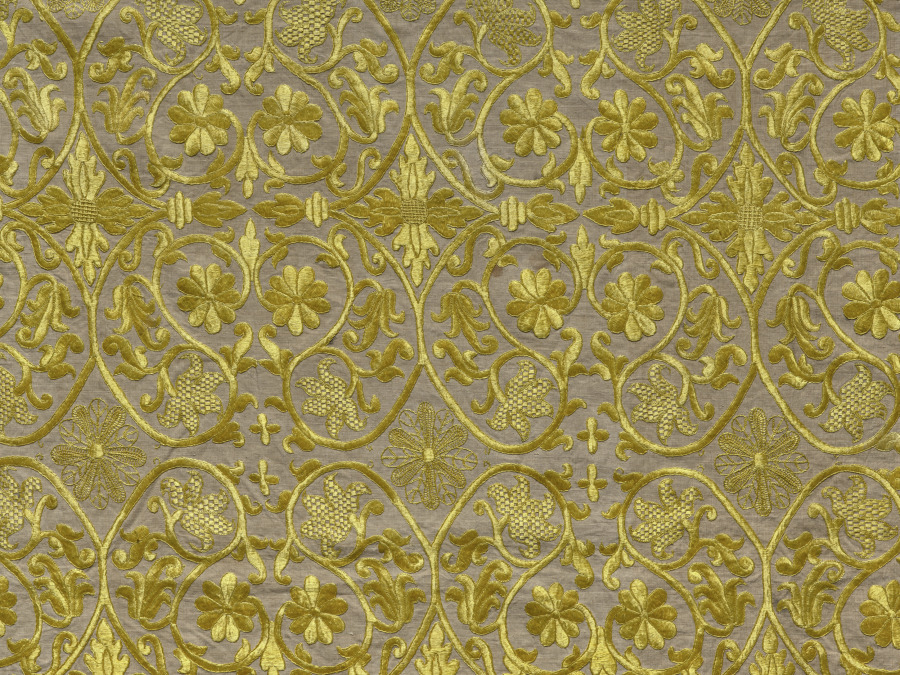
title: Embroidered Bedspread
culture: Portugal, 18th century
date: 18th century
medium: embroidery; silk on linen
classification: Embroidery